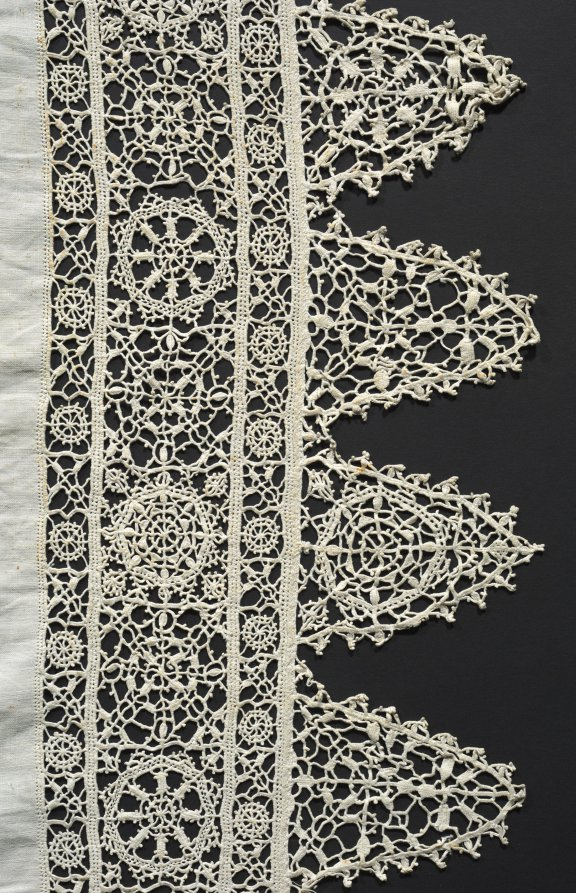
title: Cloth with Lace Edging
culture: Italy, Genoa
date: 1600s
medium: linen: needlepoint lace (reticella) top of linen sheet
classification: Lace